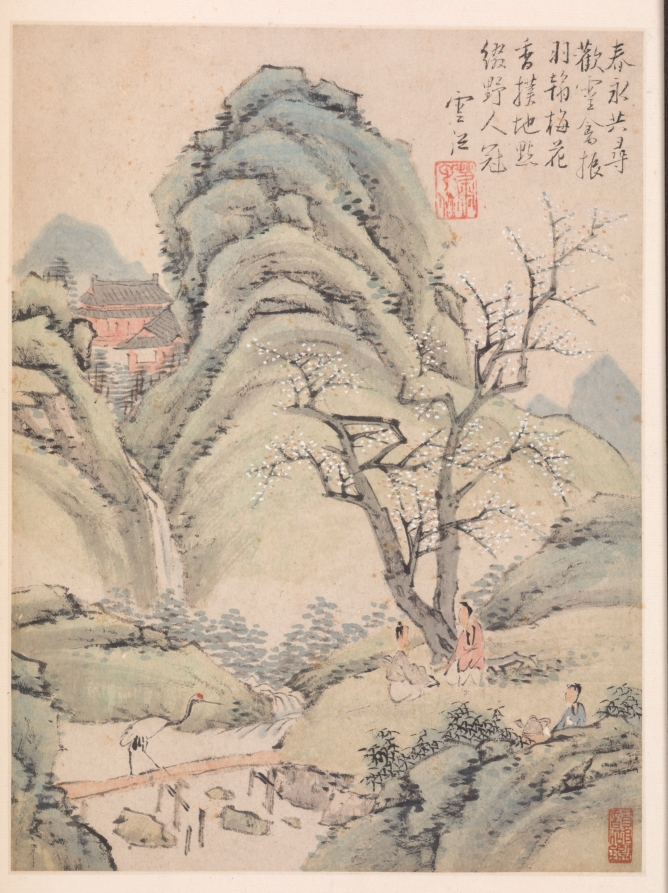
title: Album of Seasonal Landscapes, Leaf A (previous leaf 4)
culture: China, Qing dynasty (1644-1911)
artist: Xiao Yuncong (Chinese, 1596–1673)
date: 1668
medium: album leaf; ink and light color on paper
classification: Painting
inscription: Artist's inscription, signature, and 8 seals: Leaf D. In this perpetual spring, together we search out pleasure/ While lively birds flap their feathers./ The fragrance of the prunus strikes the ground;/ Its blossoms adorn the caps of rustics. Yuncong [seal] Xiao Yuncong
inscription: 9 additional seals: 2 of Chen Yixi 陳奕禧 (1646-1709); 4 of Li Yufen 李玉棻 [Li Yunhu 李韵湖] (active mid-1800s); 3 unidentified.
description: Throughout his lifetime, Xiao Yuncong visited Nanjing and Yangzhou, cities embedded in the fertile and water-rich Jiangnan region, as reflected in his paintings. Xiao painted from nature, and his landscapes are informed by the seasons and his travels, as well as by his experience as a print designer. Xiao’s fresh, light colors continue to appear in later Shanghai school paintings. This album was formerly in the collection of Li Yufen in Yangzhou and then owned by Wu Hufan in Shanghai. While the artist impressed his seal consistently below his poetic inscriptions in the upper parts of the composition, the red seals on the margins and in the lower corners of the paintings are impressions by the album’s previous owners.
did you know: The plum blossoms identify this painting as early spring.